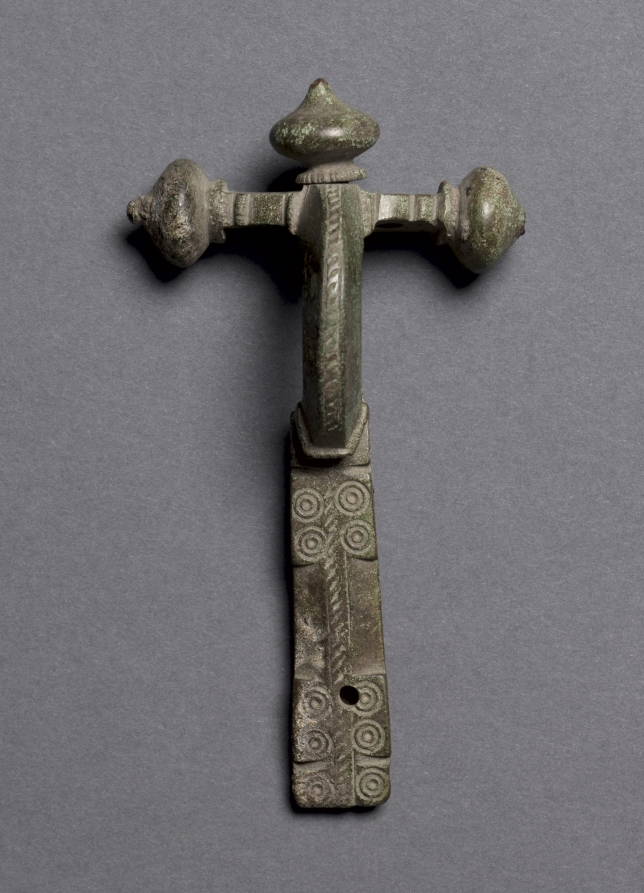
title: Cross-bow Fibula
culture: Italy, Roman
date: 1–200 CE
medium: bronze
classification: Jewelry